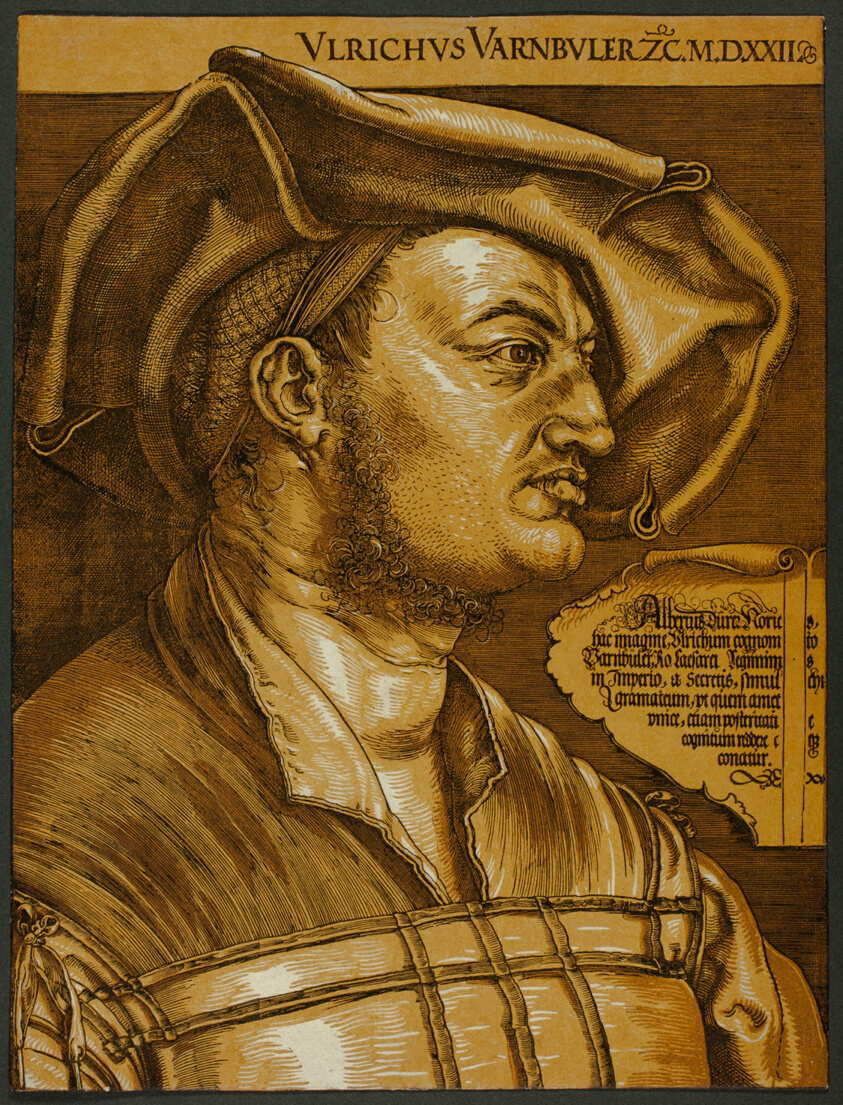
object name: Print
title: Ulrich Varnbüler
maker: Albrecht Dürer (German, 1471-1528); printed by Willem Janszoon Blaeu (Dutch, 1571-1638)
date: 1522, printed c. 1620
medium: Woodcut in black on ivory laid paper with added brown and sepia tone blocks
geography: Germany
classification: woodcut; print; prints and drawing; paper